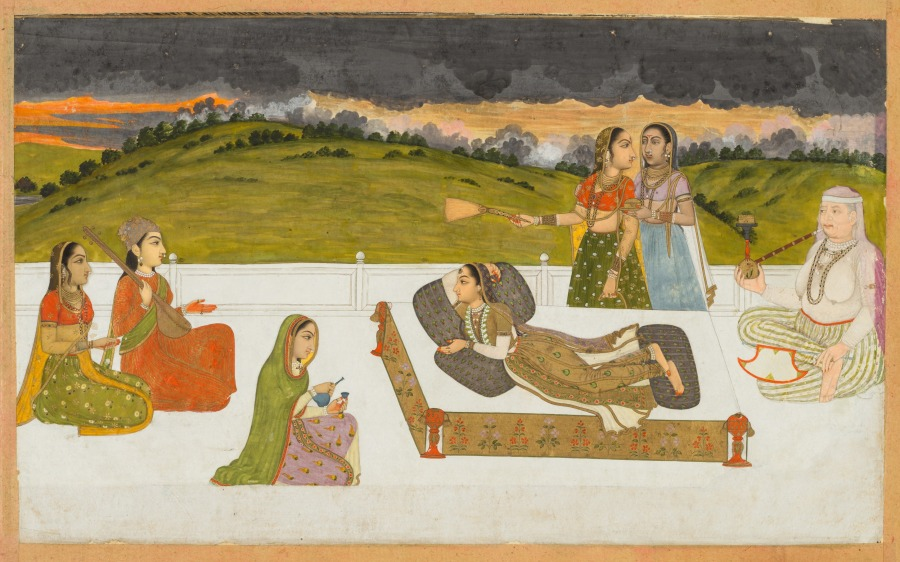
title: A princess reclining on a terrace with attendants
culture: India, Mughal, 18th century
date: c. 1730–1740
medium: Gum tempera and gold on paper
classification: Painting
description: This scene presents an idealized view of the life of a Mughal princess. Bejeweled and dressed in costly garments, she reclines on a couch set up on a white marble terrace. She watches two musicians sing and clap time, and a companion pours for her a cup of liquor. Two attendants stand behind, one waving a whisk to keep away the insects and another holding a box of paan, a betel-leaf preparation for freshening the breath. At the far right an older woman of the harem holds a fan while enjoying a hookah.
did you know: White is the color worn by widows.